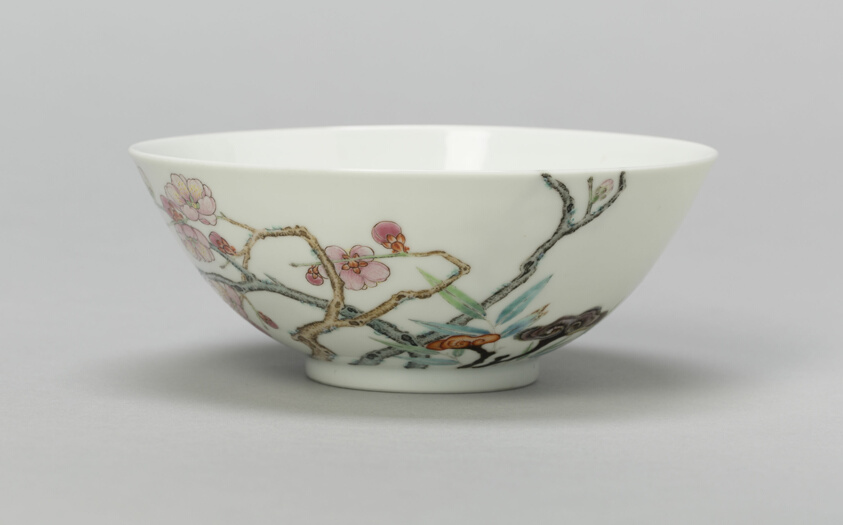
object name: Vessel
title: Bowl with Plum, Peach, Bamboo, and Lingzhi Mushrooms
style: Chinese (culture or style)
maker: China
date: Qing dynasty (1644–1911), Yongzheng reign mark and period (1723–1735)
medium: Porcelain painted in overglaze enamels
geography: China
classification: bowl; porcelain; dish (vessel); asian art; ceramics; vessel